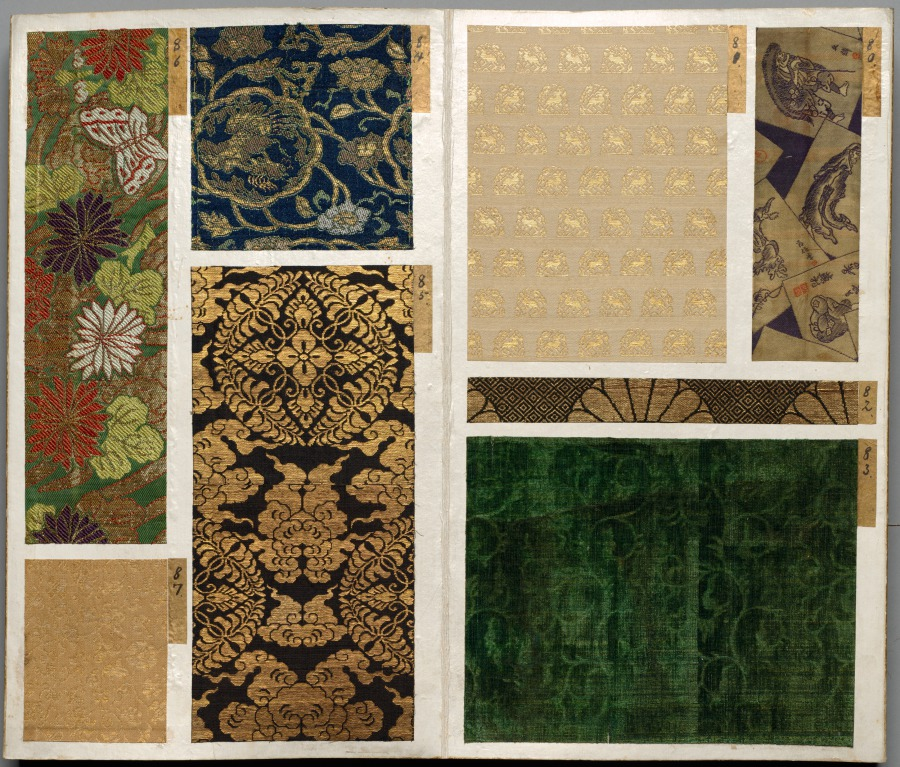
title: Album of Textile Samples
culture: Japan, Edo period (1615–1868)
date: 1600s-1700s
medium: silk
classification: Textile